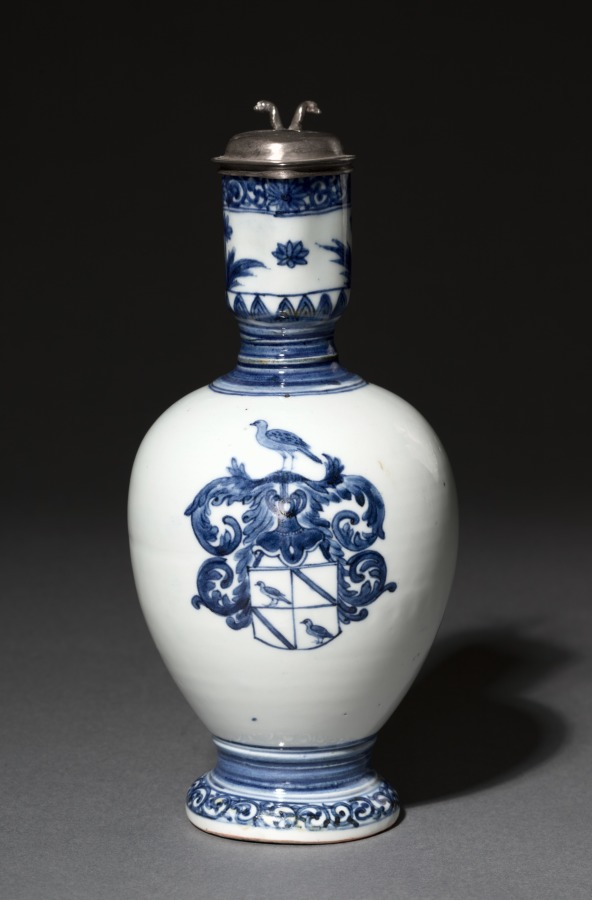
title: Pair of Jugs with Silver Mounts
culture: Japan, Edo period (1615–1868)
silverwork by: Barent van Leeuwen (Dutch, 1637–1682)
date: c. 1662–76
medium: Porcelain with underglaze blue decoration; silver mounts (Hizen ware, Arita type)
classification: Ceramic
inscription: [on silver]: town mark for Amsterdam; lion rampant crowned (alloy mark for 0-934 silver); d (date letter for 1666), maker's mark of Barent van Leeuwen.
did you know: The coat of arms on this jug are those of the Valckenier family, active in the Dutch East India Company.